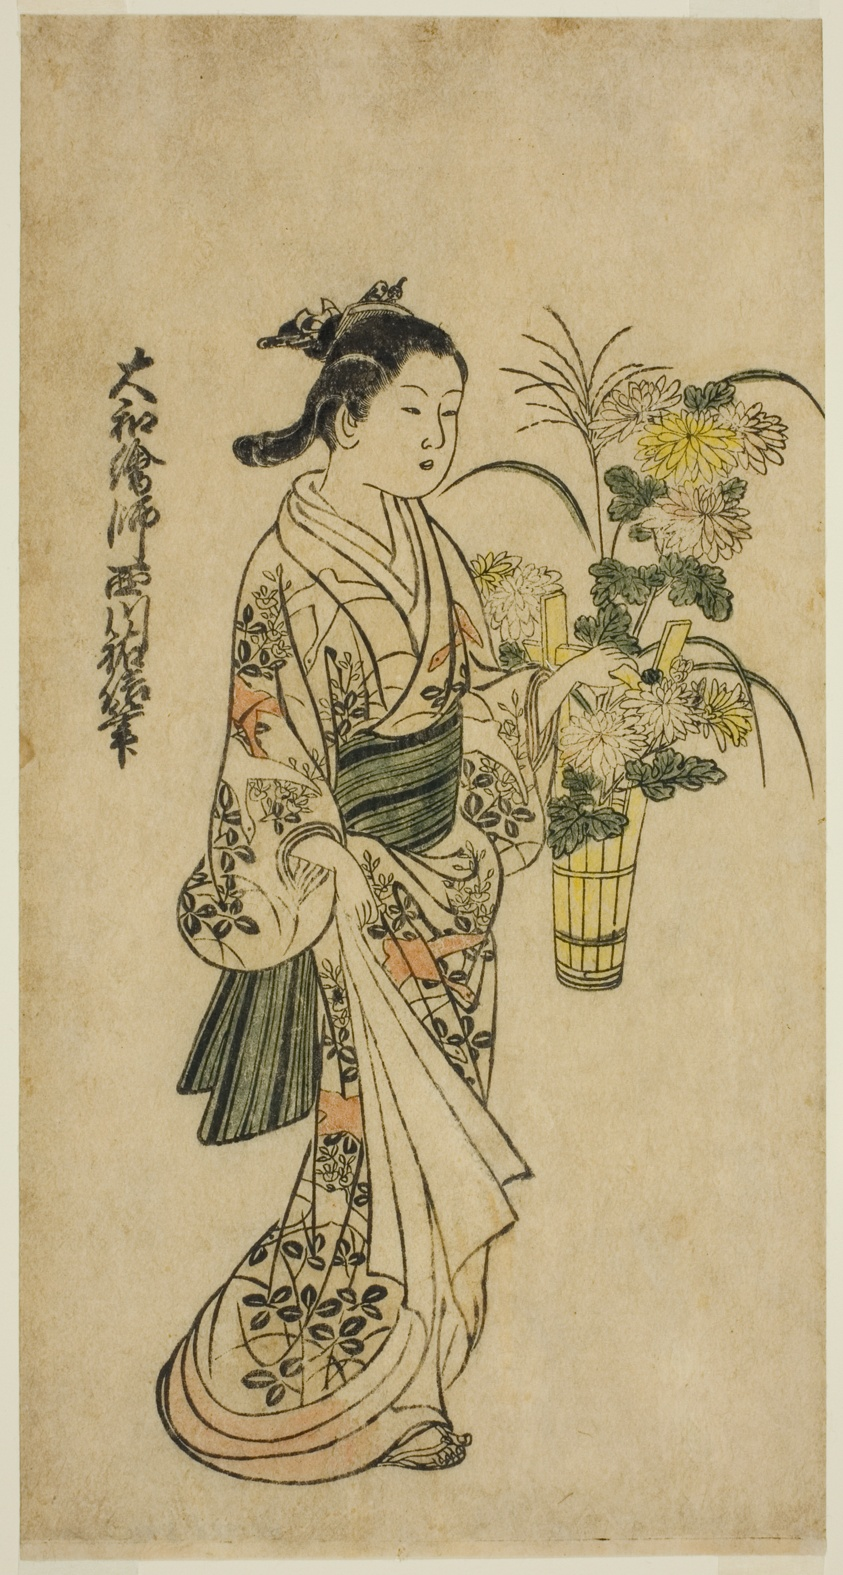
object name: Print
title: Young Girl Carrying a Flower Arrangement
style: Japanese (culture or style)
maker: Nishikawa Sukenobu (Japanese, 1671–1750)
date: first half of 18th century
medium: Hand-colored woodblock print; page from an illustrated album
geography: Japan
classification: woodblock print; print; asian art